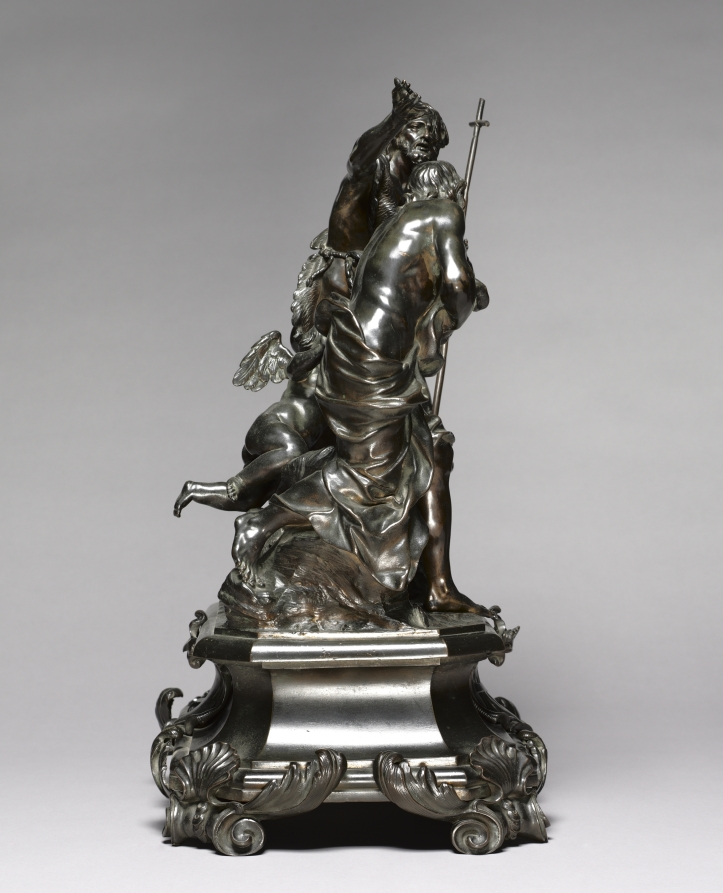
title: Baptism of Christ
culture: Italy, 17th century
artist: Alessandro Algardi (Italian, 1598–1654)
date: designed 1645–46, probably made 1650–55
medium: bronze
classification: Sculpture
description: When Innocent X (Giovanni Battista Pamphili, ruled 1644–55) became pope, Alessandro Algardi endeavored to obtain his patronage. This bronze Baptism of Christ is a casting from the molds used for an original silver sculpture that Algardi presented to the new pope to gain his support in 1646. The composition depicts an important scene in the life of Christ. On the right is John the Baptist, who pours water onto Jesus's head from a shell. As Christ bows his head to be baptized, a little angel holds the edge of his cloak. Algardi worked carefully to make this piece exciting from a number of points of view. Its dramatic emphasis shifts, depending on the viewer's vantage point.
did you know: Algardi's sculpture plays on its intended recipient's given name: Giovanni Battista (John the Baptist).